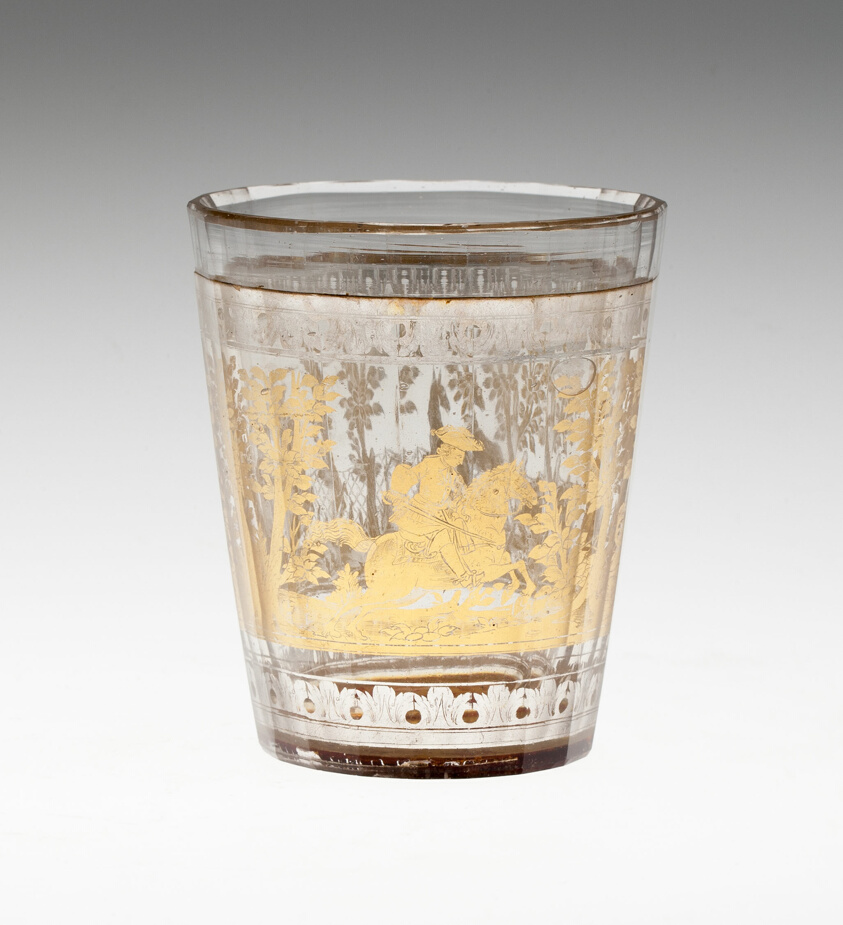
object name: Glass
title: Beaker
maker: Bohemia, Czech Republic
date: c. 1730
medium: Glass with engraved gold leaf decoration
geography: Bohemia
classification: drinking vessel; glass; european decorative arts